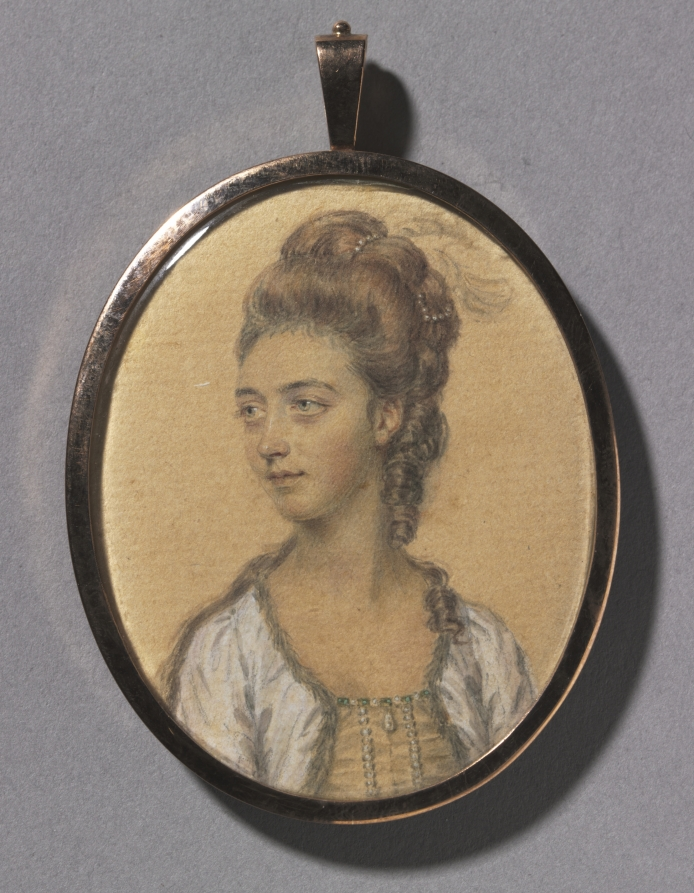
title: Portrait of Mrs. Nathaniel Bailey, née Lamack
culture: England, 18th century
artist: John I Smart (British, 1741–1811)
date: c. 1776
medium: graphite and wash on laid paper in a modern gold frame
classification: Portrait Miniature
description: Although it is impossible to say if it was always part of the artist’s process to execute a preparatory sketch prior to painting each miniature, we do know that John Smart retained many hundreds of these sketches. A group of preparatory sketches—of which this portrait is one—descended through the Smirke family after Smart’s daughter Sarah gave a sketchbook containing preparatory portrait studies to her friend Mary Smirke, sister of the celebrated Victorian architect Sydney Smirke. This book was probably broken up around 1877 when it was divided between Sydney’s daughters Mary Jemmett and Mrs. Lange, whose portions were both sold at auction in 1928. Compared to his contemporaries George Engleheart (1752–1829) and Andrew Plimer (1763–1837), whose female sitters were often painted in similar simple white gowns, Smart often lavished more attention on the costumes in his portraits of women, whose dresses incorporated colored silks, printed fabrics, and luxury trimmings like lace and fur, as seen in this portrait. Mrs. Bailey wears a violet surcoat trimmed with fur, worn over a cream-colored gown trimmed with a border of alternating pearls and blue stones and two vertical rows of pearls with one large pearl between them. Her brown hair is dressed high with ringlets descending down her neck and over her shoulders. The coiffure is ornamented with a strand of pearls and two ostrich plumes. The case is modern, and there is a brownish cast to what was originally pale, cream-colored paper—the result of light exposure changing the color over time. Smart’s preparatory sketches were compiled in books but once removed were often grouped in frames or placed in lockets such as this one. This portrait was part of the Smirke collection owned by Mary Jemmett, who sold it at Christie’s, London, on February 29, 1928. Lot 61 for this sale is described as “Mrs. Bailey, wearing pale mauve and white dress, her hair dressed high and trimmed with feathers.” The sitter, Mrs. Nathaniel Bailey (née Lamack), of Clapham, married the member of Parliament for Abingdon on March 18, 1773. Her husband was of sufficient means and is recorded in 1775 as having performed his annual distribution of £100 of bread and meat to the poor of his borough. Little else is known about this sitter. This drawing was a preparatory study for a portrait on ivory, signed and dated 1776, and measuring 2 inches high. The ivory miniature was formerly in the Ashcroft collection and was sold at Sotheby’s, London, in May 1946 to Arthur Jaffé, having previously been on loan to the Victoria and Albert Museum from 1924 to 1939. In this sale the miniature is described as “An Attractive Miniature of a Lady, by John Smart, signed and dated 1776, head and gaze three-quarters dexter, a white feather and pearls in her high piled chestnut hair, ringlets falling to the shoulders, wearing a pearl and emerald bordered low-cut cream dress and fur trimmed lavender jacket.” It most recently sold at Christie’s, London, in 2003. This portrait miniature is identical to the preparatory sketch here, both of which describe the sitter as wearing a faintly violet costume, though this color is no longer discernible in the sketch. The current location of the miniature on ivory is unknown. Edward Greene donated this and nine other preparatory studies by Smart to the Cleveland Museum of Art in 1941 and 1942. This sketch was acquired by Greene from Leopold Davis for around $260 in 1930. Although this portrait was probably part of the same sketchbook as the other nine purchased by Greene, Davis did not indicate whether or not this was indeed the case. The majority of these sketches were in a compromised condition, with fading and foxing especially prevalent.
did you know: Sketches helped John Smart work out the particulars of a portrait before commencing the miniature on ivory, and they were useful in the event that a duplicate might later be required.